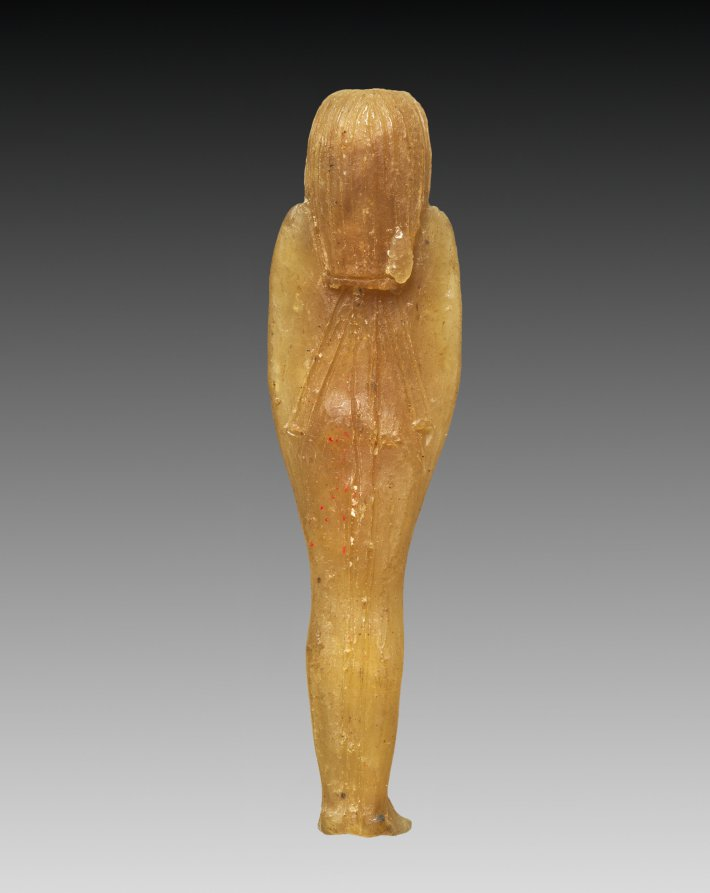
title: Son of Horus: Imsety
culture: Egypt, Third Intermediate (1069–715 BCE), Dynasties 21–22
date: 1000–900 BCE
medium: honey-colored wax with dark amber varnish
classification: Funerary Equipment